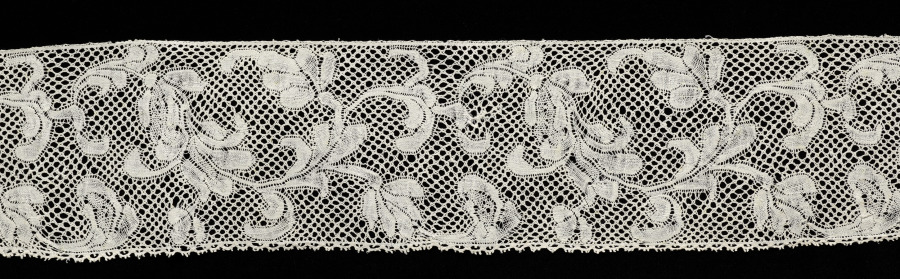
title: Lace Edging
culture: Italy, Milan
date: 1800s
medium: linen: bobbin lace with Flanders ground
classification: Lace